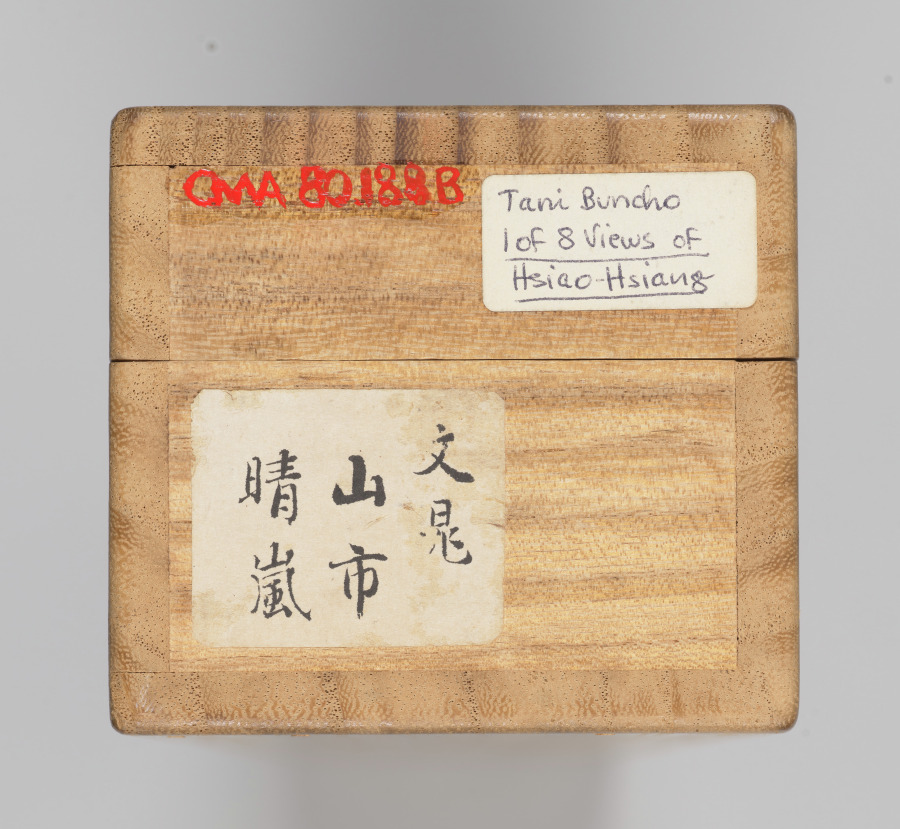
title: Mountain Market in Clearing Mist, from Eight Views of Xiao-Xiang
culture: Japan, Edo period (1615–1868)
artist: Tani Bunchō (Japanese, 1763–1841)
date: 1788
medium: album leaf remounted as a hanging scroll; ink and color on paper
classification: Painting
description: This painting was part of a set of album leaves representing the Eight Views of Xiao-Xiang, a theme originating in Chinese poetry and painting that spread to both Korea and Japan. Southern China’s Xiao-Xiang area, where the mist-covered banks of the Xiang River created a complex landscape shifting like the moods and minds of people, captured the imaginations of generations of painters and calligraphers. Inscriptions on these works suggest that they were possibly ordered by newly prominent Japanese Confucian scholars.